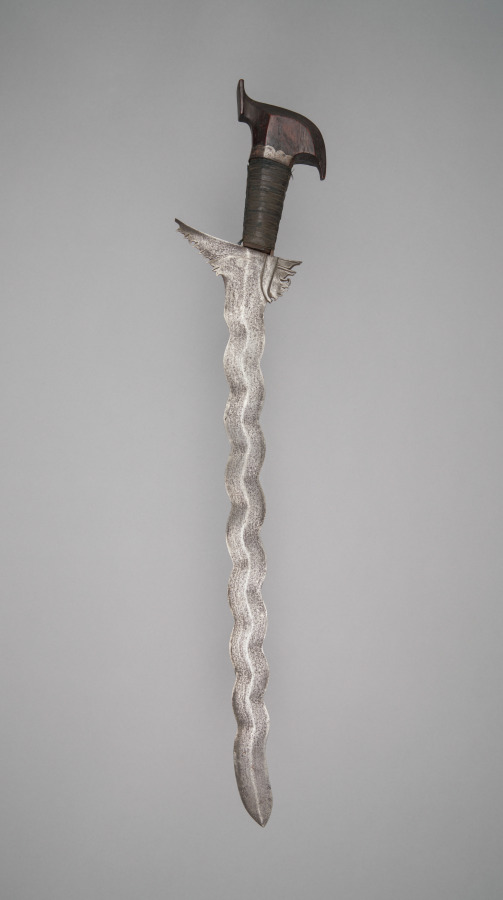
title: Sword (Kalis or Sundang)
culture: Philippines, Mindanao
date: 1800s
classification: Arms and Armor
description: The blade of this kalis displays undulations across its entire length, as well as flared shoulders and a pierced wing-type guard carved with okir-style serrations. A single asang-asang (fish gill) clamp secures the guard. The kamagong pommel takes the form of a cockatoo (kakatua). The shape and material indicate a functional but less prestigious object compared with ivory and silver examples made for the Tausug or Maranao people.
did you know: Blades with an odd number of undulations were preferred; this example has nine.